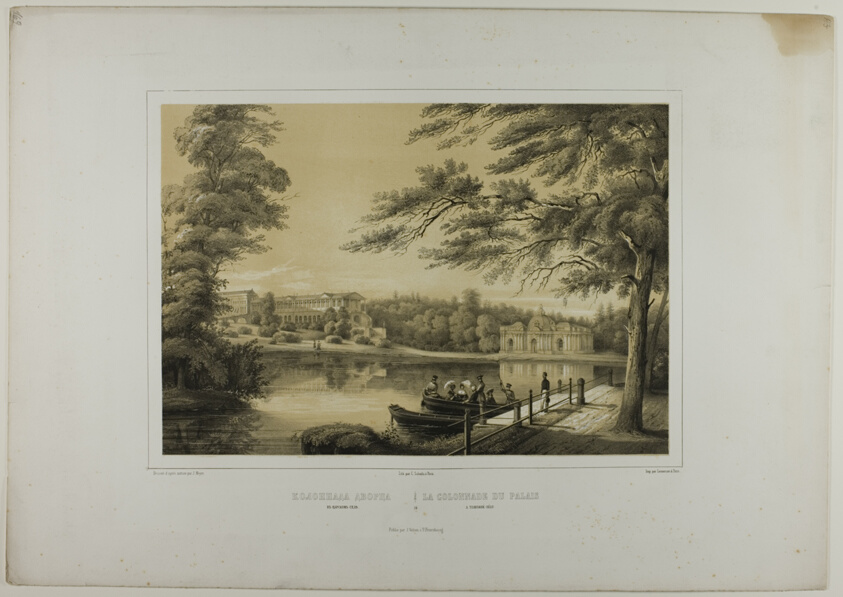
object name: Print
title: The Colonnade of the Tzarskoé-sélo Palace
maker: C. Schultz (possibly German, active. c. 1820-1830); after J. Meyer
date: c. 1820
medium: Lithograph in black with second fawn tint stone on ivory wove paper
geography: Germany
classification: lithograph; print; prints and drawing